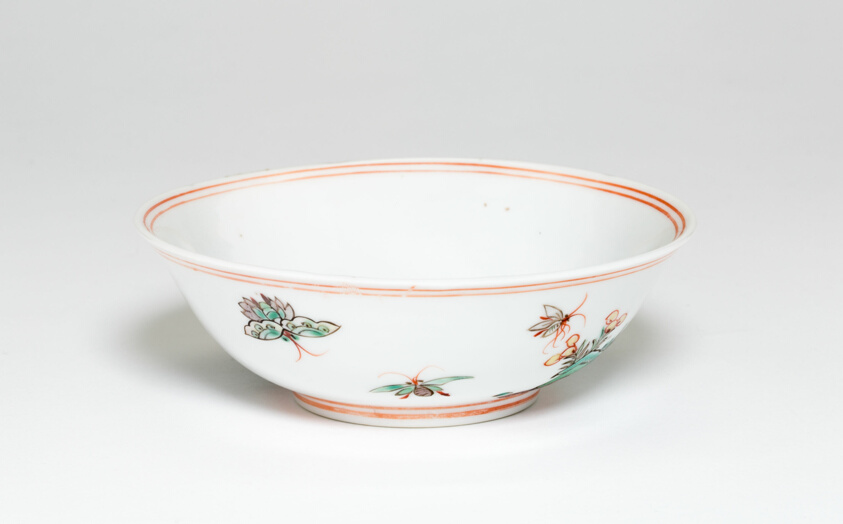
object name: Vessel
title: Bowl with Butterflies and Rocks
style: Chinese (culture or style)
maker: China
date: Ming dynasty (1368–1644), Jiajing reign mark and period (1522–1566)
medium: Porcelain painted in underglaze iron red and overglaze enamels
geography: China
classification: bowl; dish (vessel); asian art; ceramics; porcelain; vessel